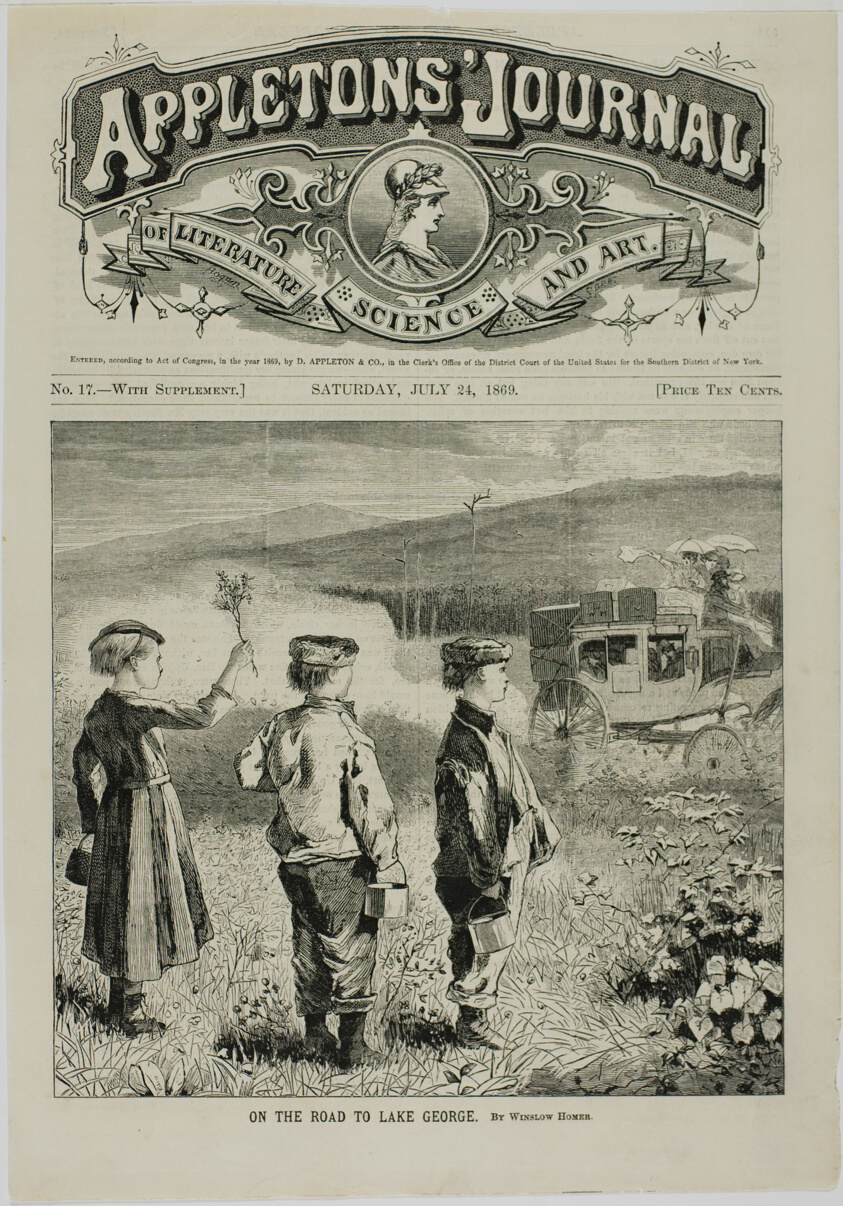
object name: Print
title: On the Road to Lake George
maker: Winslow Homer (American, 1836-1910); published by Appletons' Journal (American, 1869-1881)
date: published July 24, 1869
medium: Wood engraving on paper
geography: United States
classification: wood engraving; print; prints and drawing